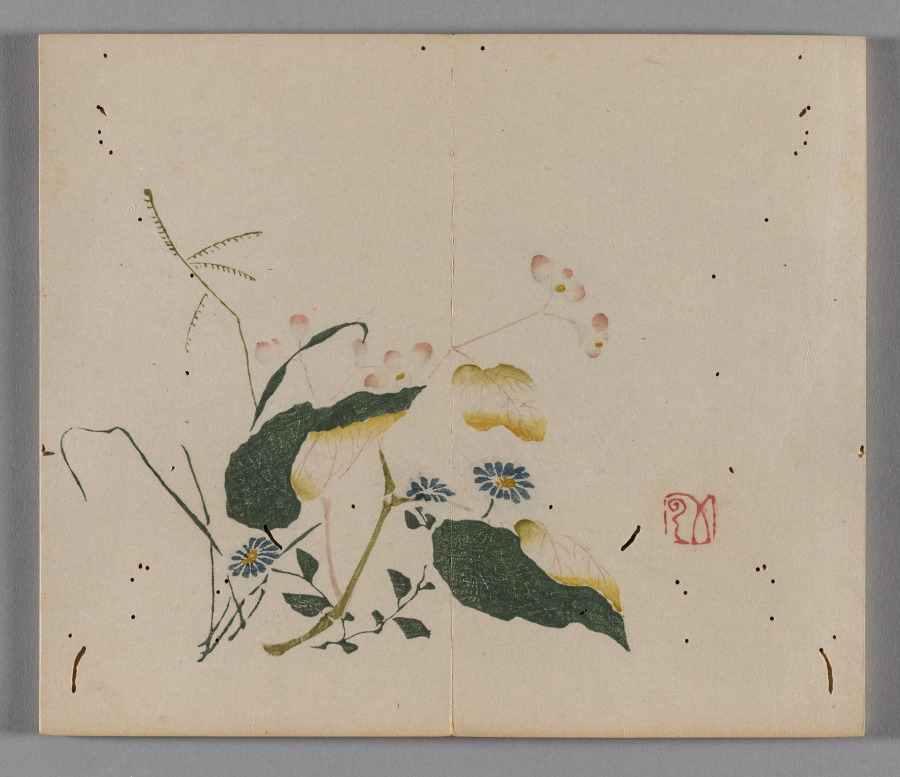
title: Ten Bamboo Studio Painting and Calligraphy Handbook (Shizhuzhai shuhua pu): Miscellaneous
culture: China, Qing dynasty (1644-1911)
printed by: Hu Zhengyan (Chinese, c. 1584–1674)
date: 1633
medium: Woodblock-printed book; ink and colors on paper; first edition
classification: Print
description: Color printing reached a level of perfection in the early 1600s, as seen in this Ten Bamboo Studio Collection of Calligraphy and Painting and the Mustard Seed Garden Manual of Painting (printed 1679 and 1701). The painterly quality, precision in registering (aligning) the woodblocks, and harmonious colors made them the most successful color print editions in Chinese history. Both editions were printed and compiled in Nanjing, spread nationwide, and had a great impact on the arts in Japan and Korea.